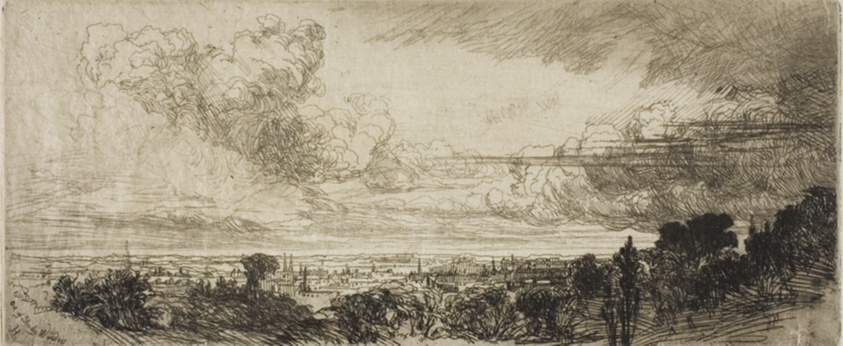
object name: Print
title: Out of Study Window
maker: Francis Seymour Haden (English, 1818-1910)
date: 1859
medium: Etching with drypoint on cream Japanese paper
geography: England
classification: etching; print; prints and drawing